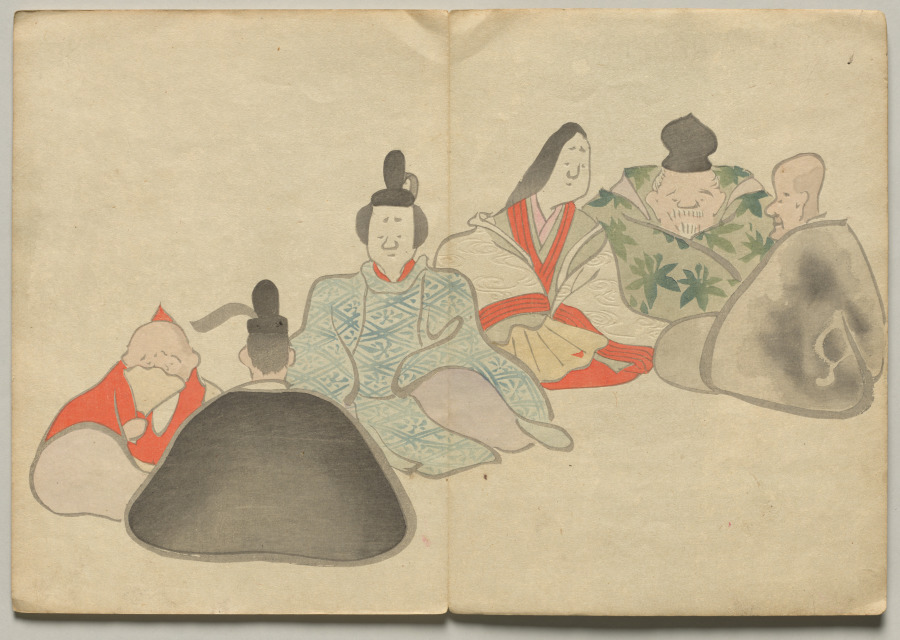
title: Scene from The Kōrin Picture Book (Volume 2)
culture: Japan, Edo period (1615–1868)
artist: Nakamura Hōchū (Japanese, d. 1819)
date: 1800s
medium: color woodblock printed book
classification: Bound Volume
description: Ogata Korin (1658-1716) was one of the most admired artists of Rimpa, or "decorative school painting." These books by the charming later-generation Rimpa artist Hochu record Korin's inventive designs.